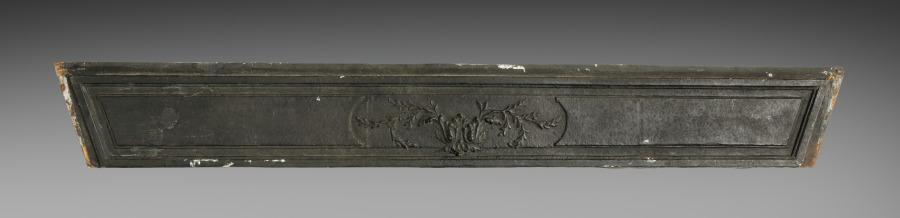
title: Set of Fire Linings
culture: France, style of Louis XVI, 18th Century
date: c. 1770–1780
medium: cast iron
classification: Furniture and woodwork